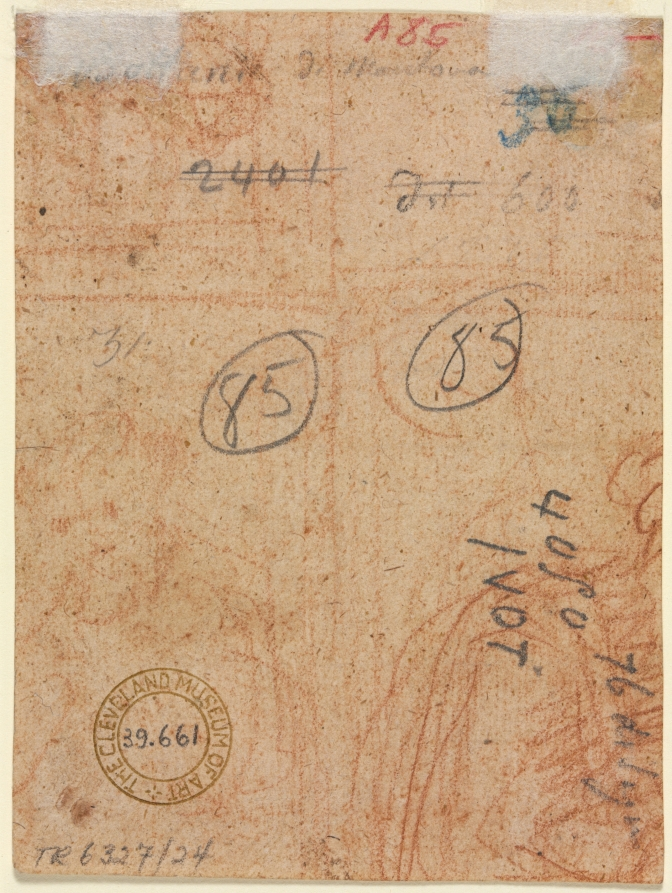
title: Fragment of Two Figures (verso)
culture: Italy, 16th century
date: 16th century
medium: red chalk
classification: Drawing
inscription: upper center, in red pencil: A 85 ; upper center, in graphite: [illegible] [Il?] [Mantova?] ; upper right, in blue pencil: 36 [crossed out in graphite] ; upper center, in graphite: 2401 [crossed out] ; upper center, in graphite: [illegible] [crossed out] ; upper right, in graphite: 600 ; upper center, in graphite(?): [19?] ; center left, in graphite: 31 ; center, in graphite: 85 [circled] ; center right, in graphite: 85 [circled] ; lower right, in graphite: 76 [disegno?] / 40[5?]0 / IVOT [all sideways]